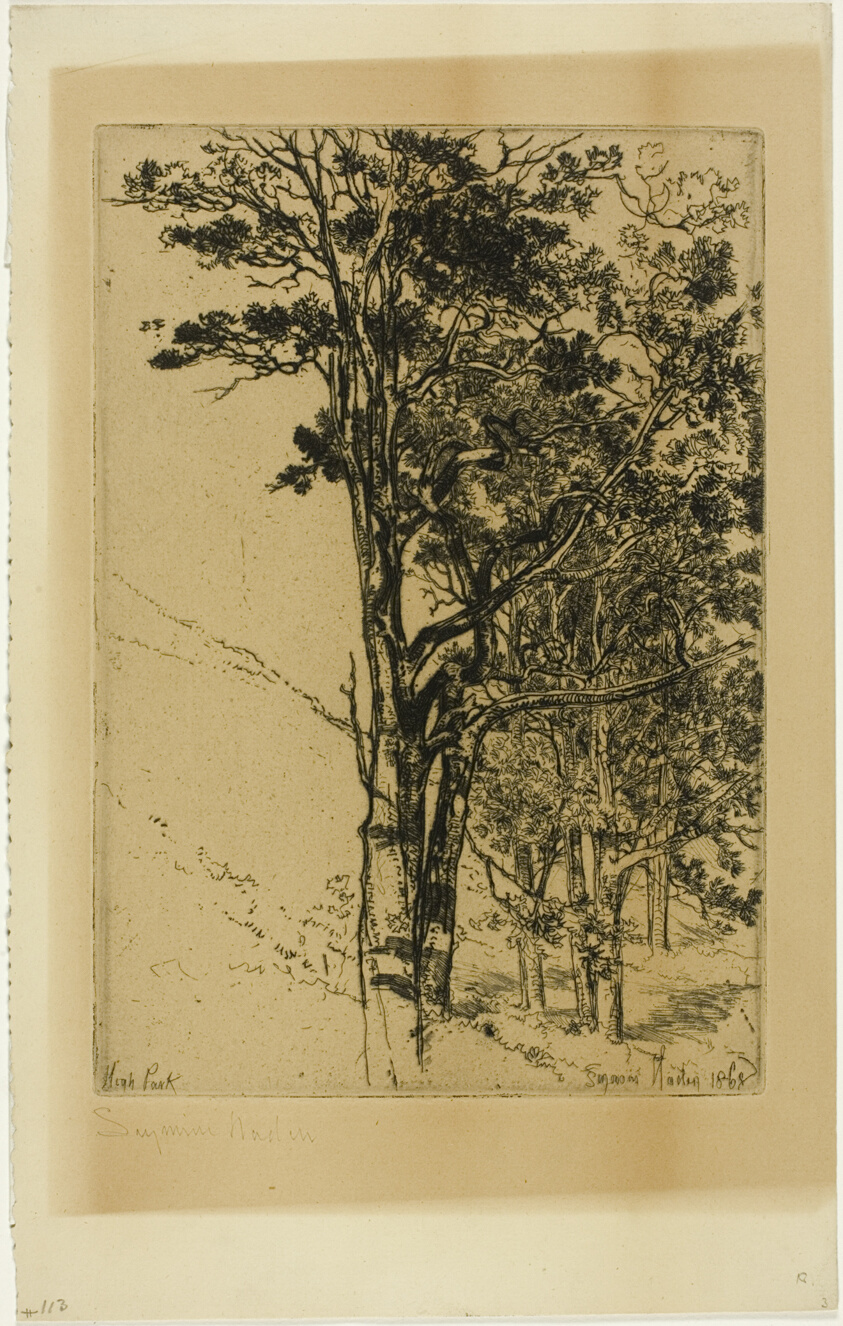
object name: Print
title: Firs (A Study)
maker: Francis Seymour Haden (English, 1818-1910)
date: 1868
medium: Etching on copper printed on cream wove paper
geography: England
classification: etching; print; prints and drawing